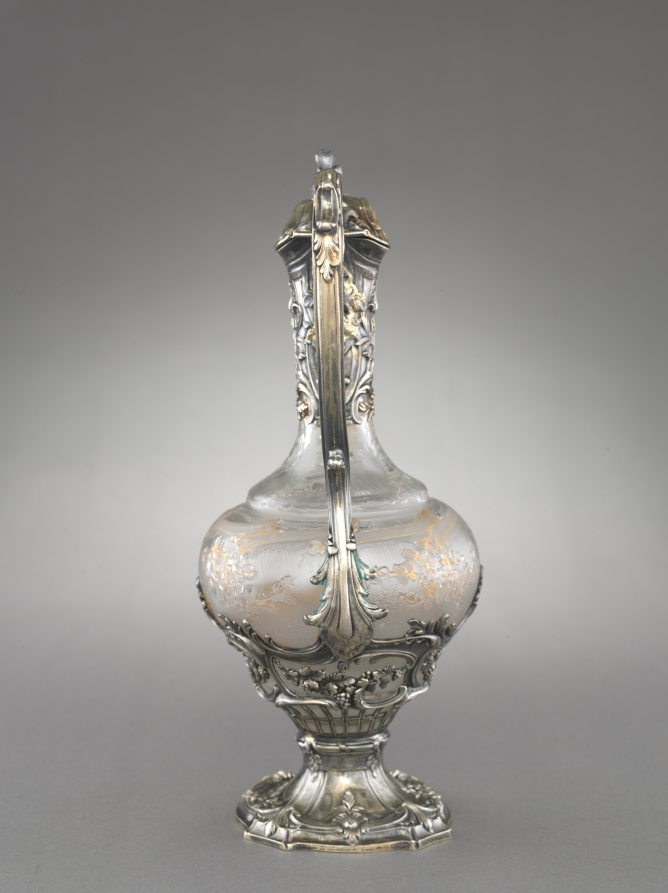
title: Wine Ewer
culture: France, 19th century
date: c. 1850–70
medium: glass with silver gilt mounts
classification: Silver